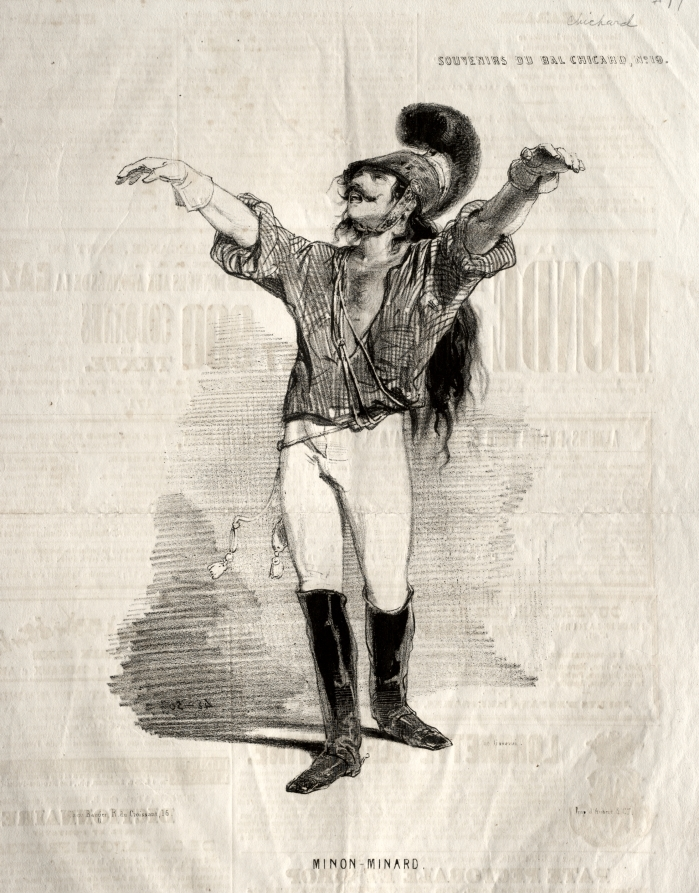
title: Souvenirs du Bal Chicard: Mignon-Minard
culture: France, 19th century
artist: Paul Gavarni (French, 1804–1866)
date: 1843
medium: lithograph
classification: Print